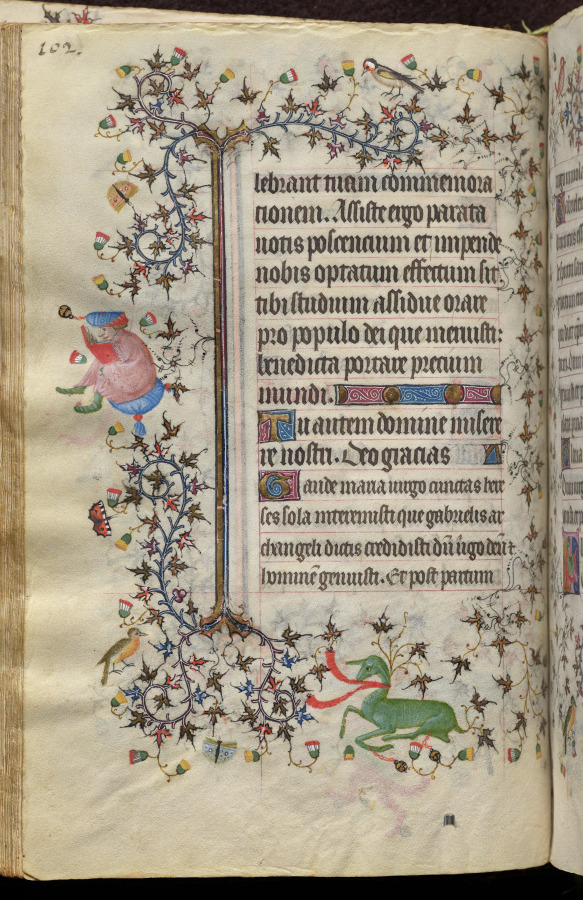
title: Hours of Charles the Noble, King of Navarre (1361-1425): fol. 51v, Text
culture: France, Paris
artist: Master of the Brussels Initials and Associates (French)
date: c. 1405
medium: ink, tempera, and gold on vellum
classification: Bound Volume